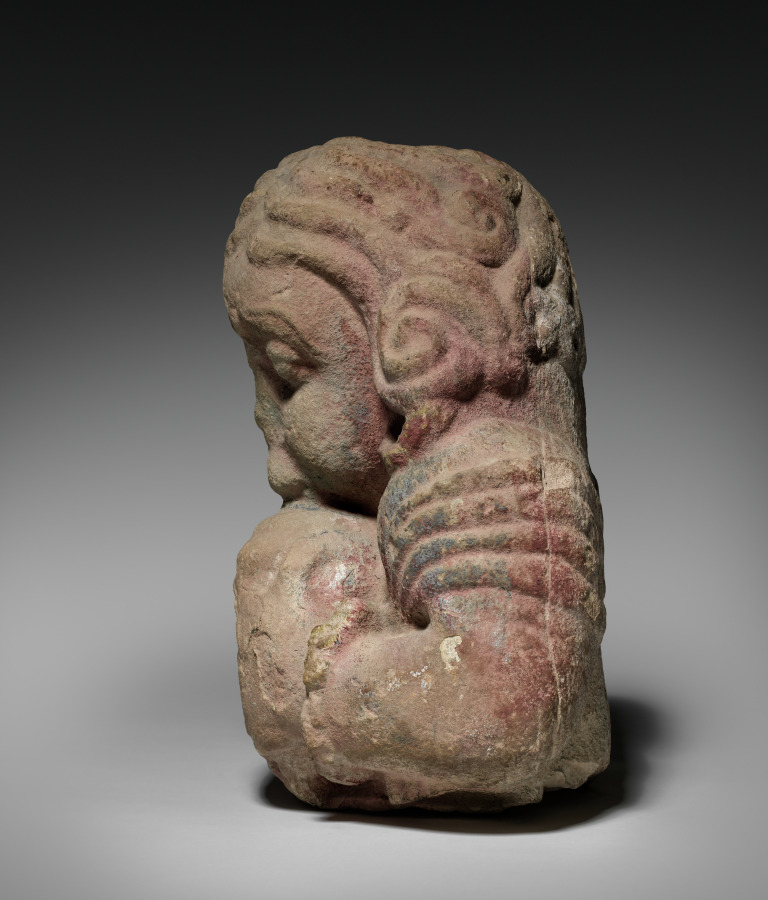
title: Shivagana Blowing Conch Shell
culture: India, Sarnath, Gupta Period, 5th Century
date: c. 400s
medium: stone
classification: Sculpture